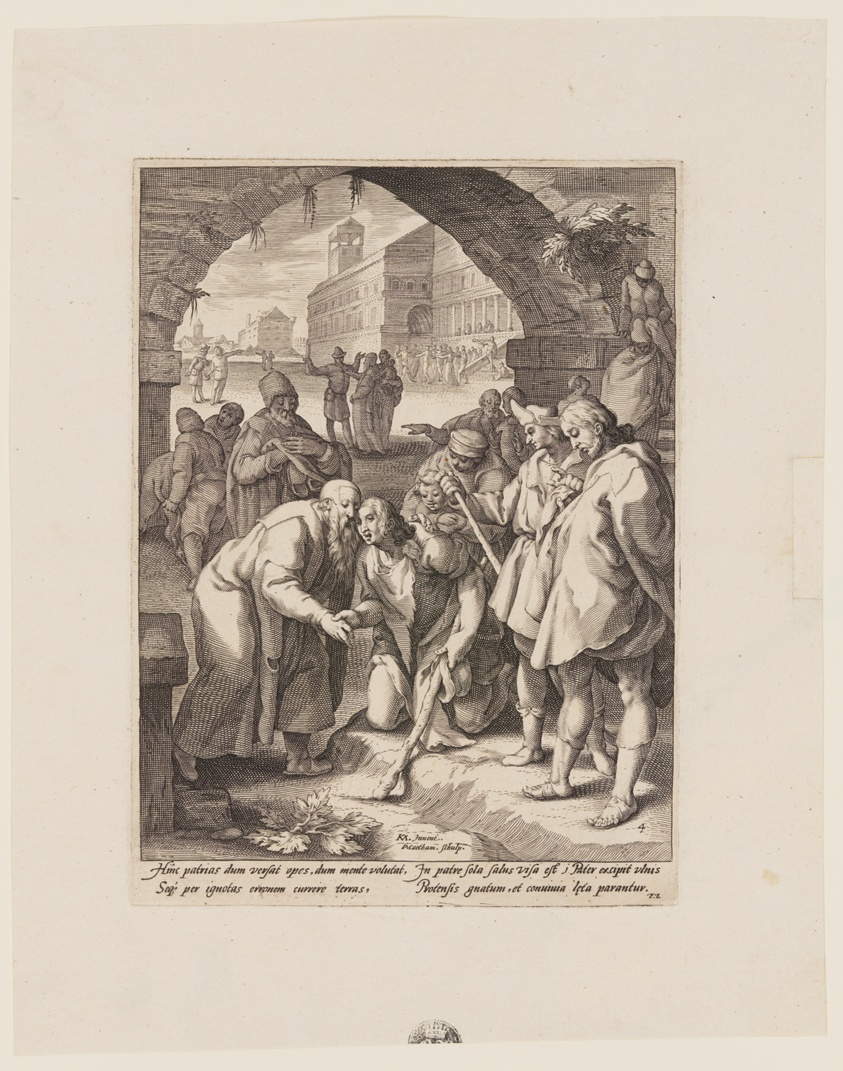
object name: Print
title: The Return of the Prodigal Son, from The History of the Prodigal Son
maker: Jacob Matham (Dutch, 1571–1631); after Karel van Mander (Dutch, 1548–1606)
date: 1592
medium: Engraving on ivory laid paper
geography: Netherlands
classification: engraving; paper; print; prints and drawing